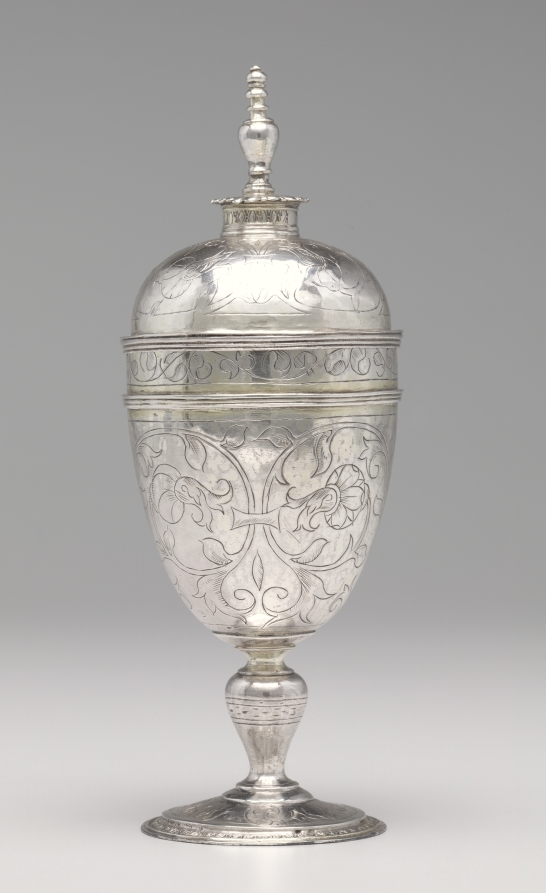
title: Standing Cup and Cover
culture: London, England, late 16th century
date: 1593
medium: silver, partially gilt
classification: Silver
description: Produced during the last years of the Tudor dynasty (1485–1603), this vessel exemplifies the symmetrical patterns, horizontal designs, and clear division of space typical of English silverwork at the time. The functional shape and ornamental designs characteristic of standing cups made them ideal for ceremonial occasions.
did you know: Often made for members of guilds and trade associations in London, standing cups were frequently used during toasts.